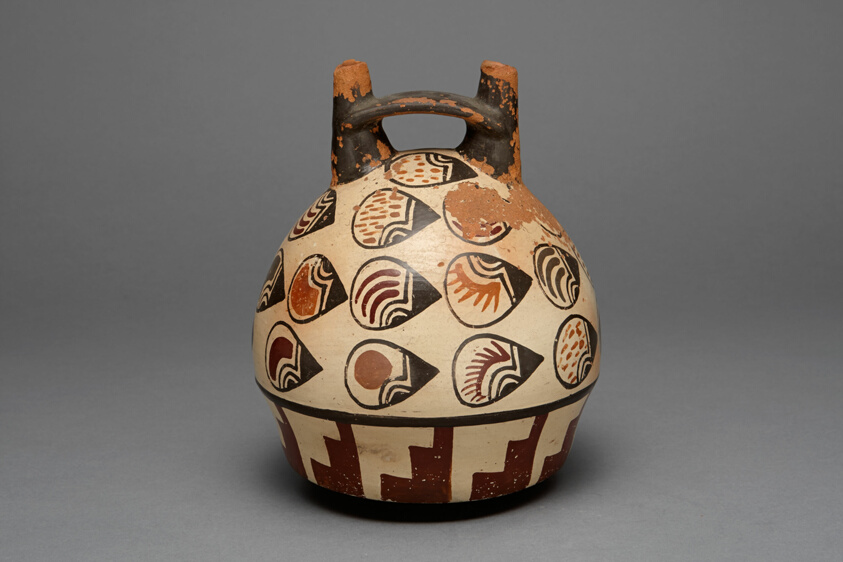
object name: Vessel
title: Bridge Vessel Depicting Abstract Motifs, Likely Beans or Seeds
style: nazca, early intermediate period, Pre-Columbian, americas, Arts of the Americas, andean, andes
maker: Nazca; South coast, Peru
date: 180 BCE–500 CE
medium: Ceramic and pigment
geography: Peru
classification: earthenware; art of the americas; ceramics; vessel